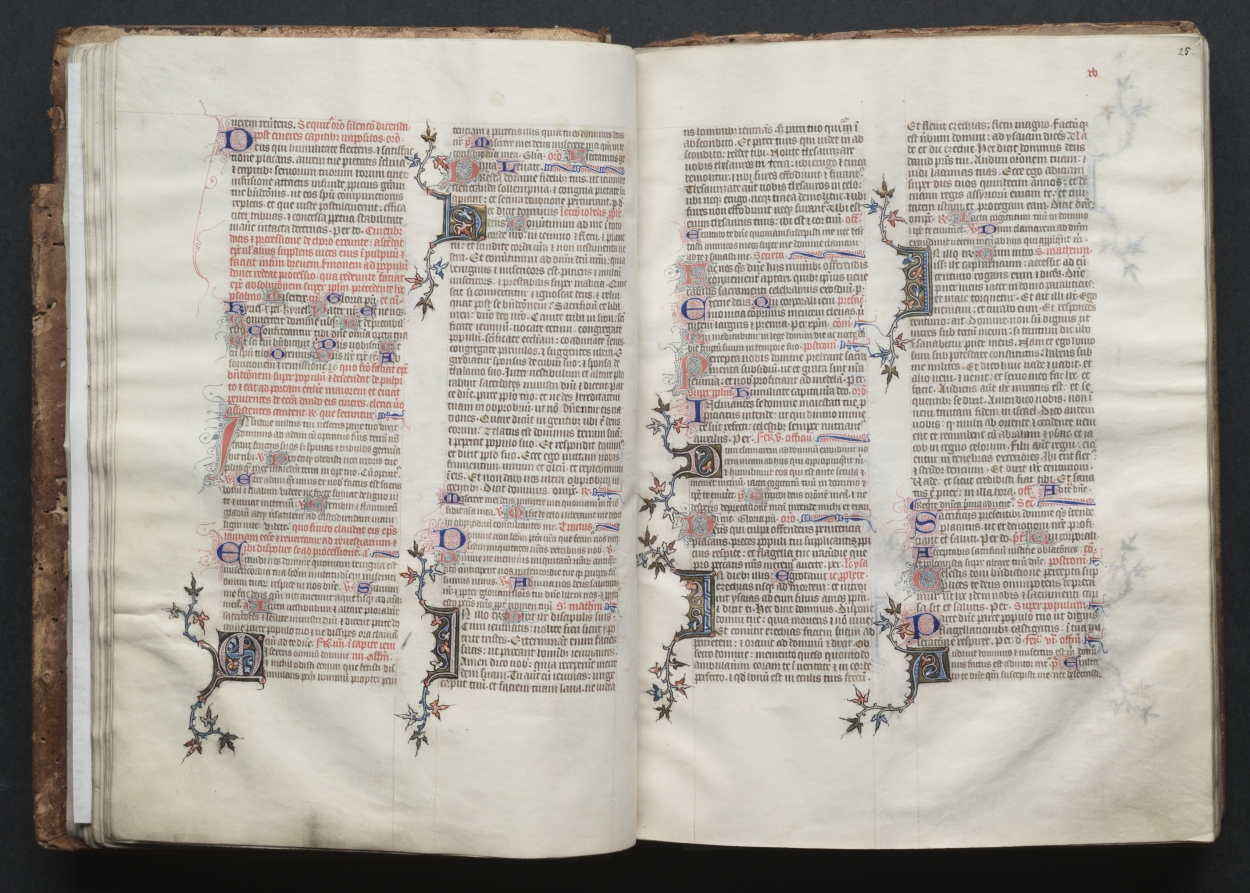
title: The Gotha Missal: Fol. 24v, Text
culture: France, Paris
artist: Master of the Boqueteaux (French)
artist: and Workshop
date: c. 1375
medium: ink, tempera, and gold on vellum; blind-tooled leather binding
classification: Bound Volume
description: The style and quality of this manuscript's decoration is typical of deluxe Parisian books made for aristocratic or royal patrons. Most of the book's decoration appears to be the work of the Master of the Boqueteaux, an artist active at the court of King Charles V (died 1380). His style was apparently shared by a number of book illuminators working in and around Paris. It is very possible that the Gotha Missal belonged to Charles V, but is not provable because the manuscript has no royal portraits and lacks a colophon. Given the book's magnificent decoration, however, it would seem that it was produced for a Valois prince, if not for the king himself. The manuscript receives its name from the German dukes of Gotha, its later owners.